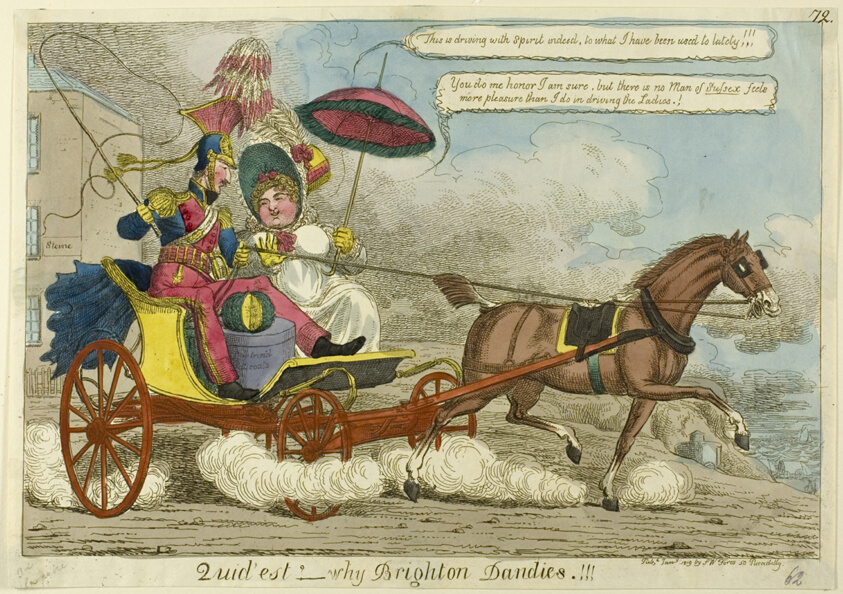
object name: Print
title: Quid est?- Why Brighton dandies.!!!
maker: Charles WIlliams (English, active 1797-1830); published by S. W. Fores (English, active 1785-1825)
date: published January 1819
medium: Hand-colored etching on ivory laid paper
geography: England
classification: etching; print; prints and drawing